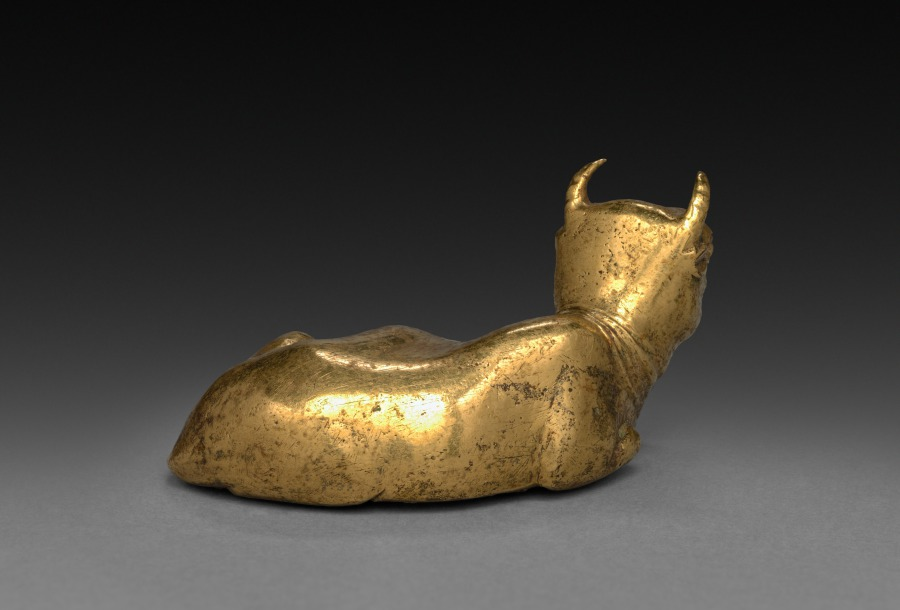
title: Recumbent Bull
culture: China, Tang dynasty (618-907)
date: 700s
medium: gilt bronze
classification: Sculpture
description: In China, access to political power was granted to those who passed the civil service examinations, a system that offered official service only at a high level of education. Chinese literati-officials whose daily routine was administrative work in an office, enjoyed precious objects on their writing table that offered distraction and demonstrated good taste, as well as the pleasure of holding and handling them. By the Ming (1368–1644) and Qing (1644–1911) dynasties, these utensils of the literati studio also became collectibles and were treasured as artworks. Made of solid gilt-bronze, this paperweight in the form of a recumbent bull was meant to be placed on a scholar’s desk. Oxen were precious livestock as they could pull carts and plows. Often depicted in landscape paintings and in pictures of tilling the spring soil, the bull’s nature was traditionally likened to the willingness of a loyal civil servant who bears the burden of hard labor without complaint.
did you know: This solid-cast bronze bull has carefully defined skin folds on its neck.